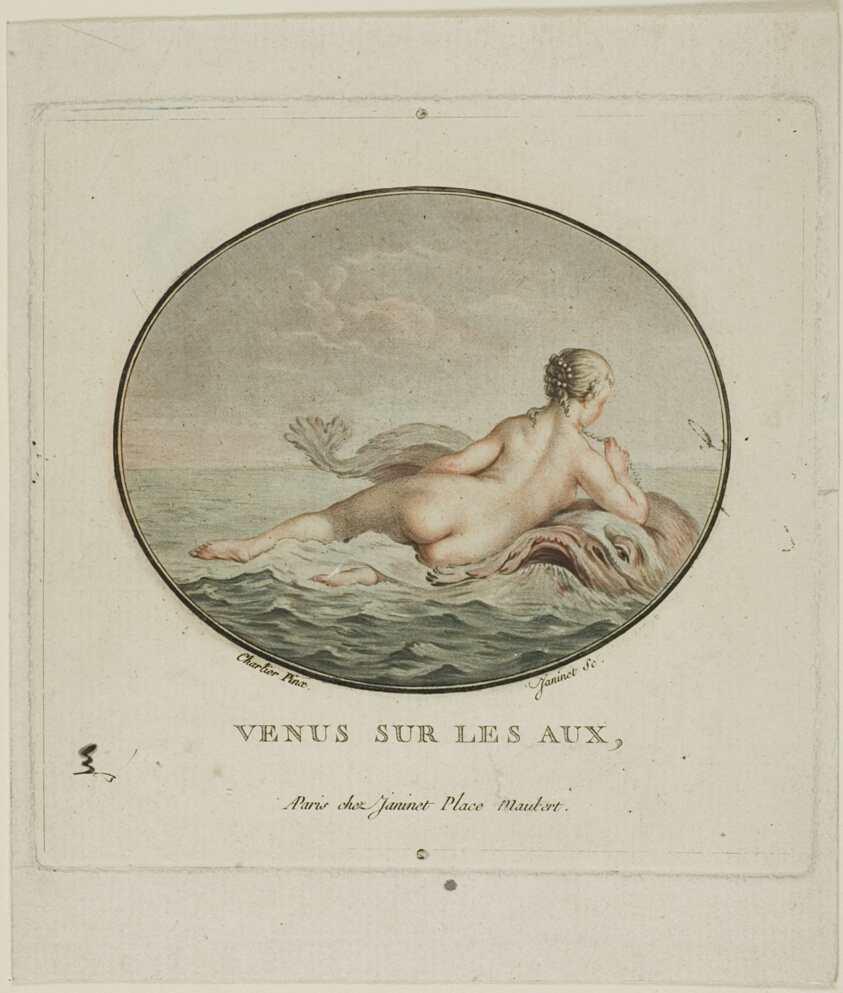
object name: Print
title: Venus Sur Les Aux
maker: Jean-François Janinet; French, 1752-1814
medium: Color engraving on paper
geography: France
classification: aquatint; print; prints and drawing